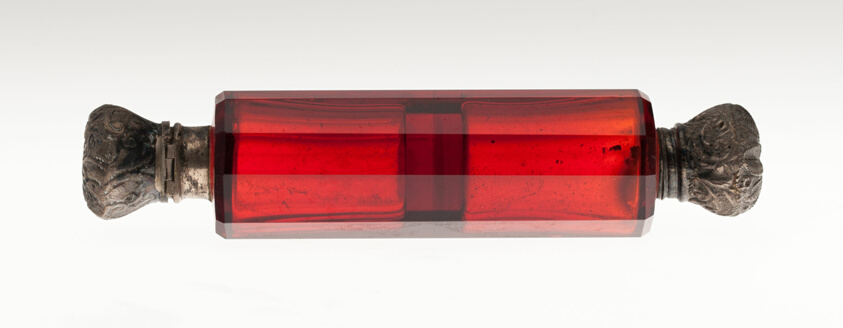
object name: Glass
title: Scent Bottle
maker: Bohemia, Czech Republic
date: c. 1840/50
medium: Glass; cut and colored with metal mounts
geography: Bohemia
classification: glass; european decorative arts